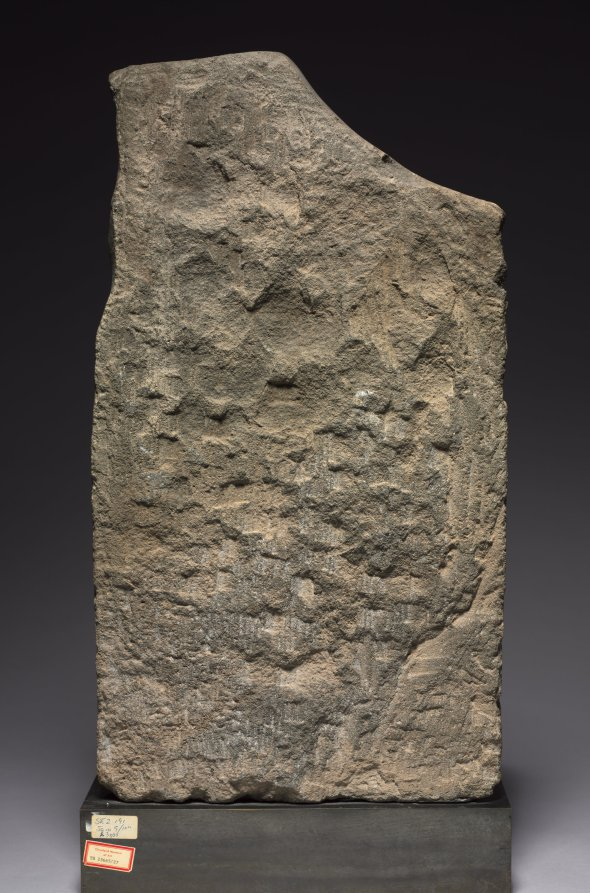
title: Door Guardian, Mahakala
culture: Indonesia, Central Java, Chandi Suko, 9th century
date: 800s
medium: volcanic stone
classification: Sculpture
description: The natural stance of this richly adorned figure indicates that he served as an attendant: the face turns to his right, while his midsection turns to the left, and the weight is on his right leg. A plain ovoid halo indicates that he is divine. The broken right hand may have held an implement or weapon that would aid in a more precise identification.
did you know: The crossed chest ornament, called a "channavira" in Sanskrit, denotes power and valor.